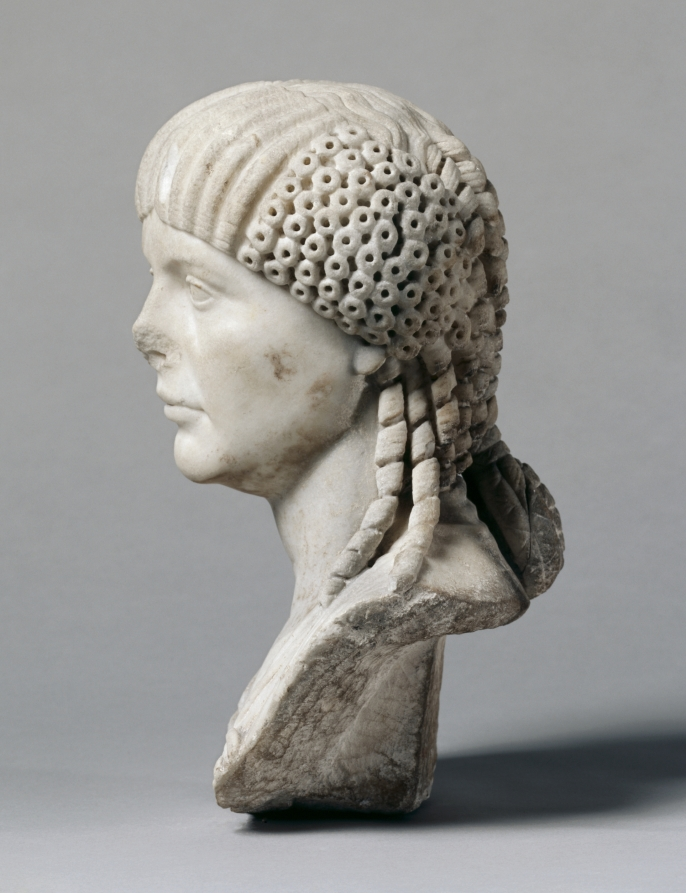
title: Portrait Bust of the Empress Claudia Octavia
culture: Italy, Roman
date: 50–70 CE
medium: marble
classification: Sculpture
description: This portrait bust depicts a young woman whose idealized features and elaborate hairstyle may identify her as the empress Claudia Octavia (r. AD 54-62), unfortunate first wife of the notorious emperor Nero. Over her tunic she wears a stola, a long garment hanging from both shoulders and distinguishing her as a married, upper-class woman. Although beloved by the Roman citizenry and described by the historian Tacitus as “aristocratic and virtuous,” Octavia was eventually divorced and banished by Nero, then ordered put to death.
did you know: The complex coiffure includes four elements: parted waves (top), tight curls (sides), hanging ringlets (shoulders, back), and a braided knot (back).